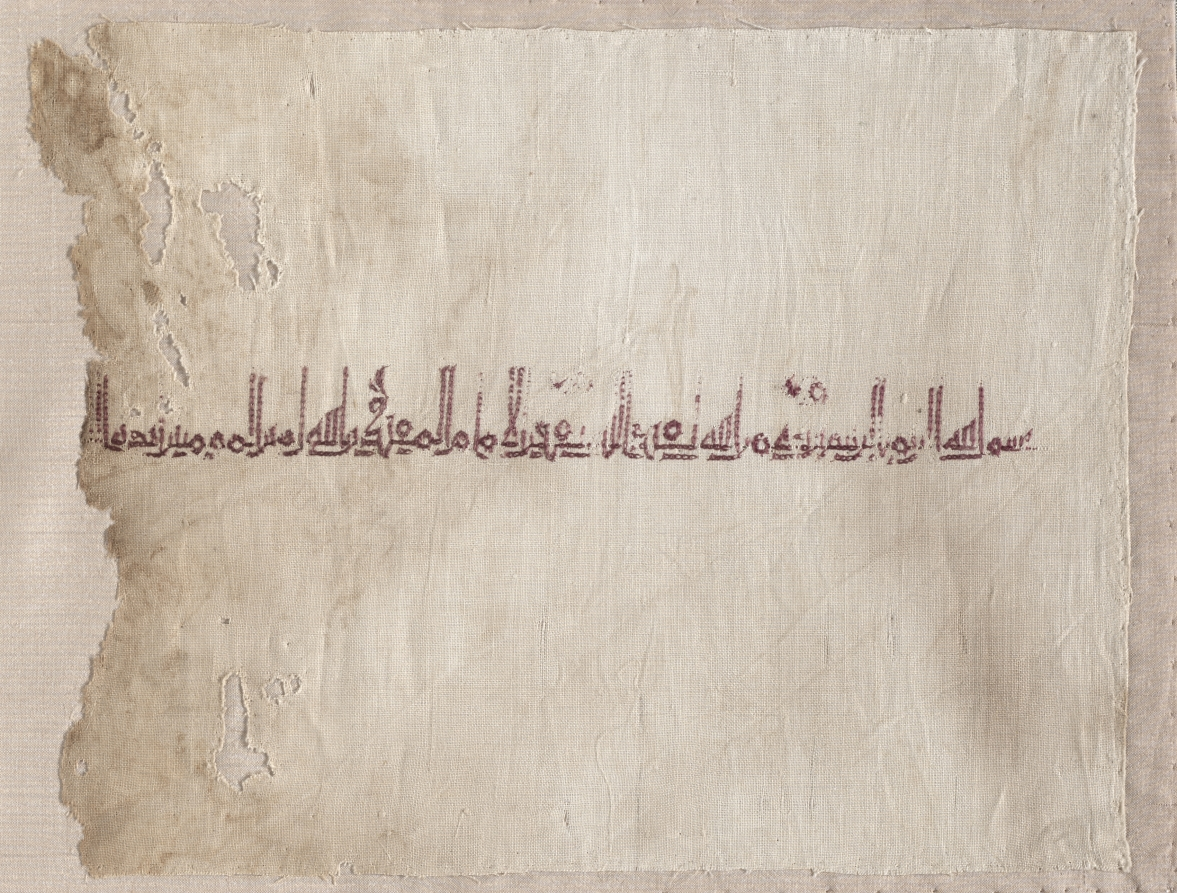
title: Fragmentary embroidered tiraz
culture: Egypt, probably Tinnis, Abbasid period, reign of Caliph al- Muqtadir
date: 918 – 920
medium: plain weave with embroidery: linen and silk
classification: Embroidery